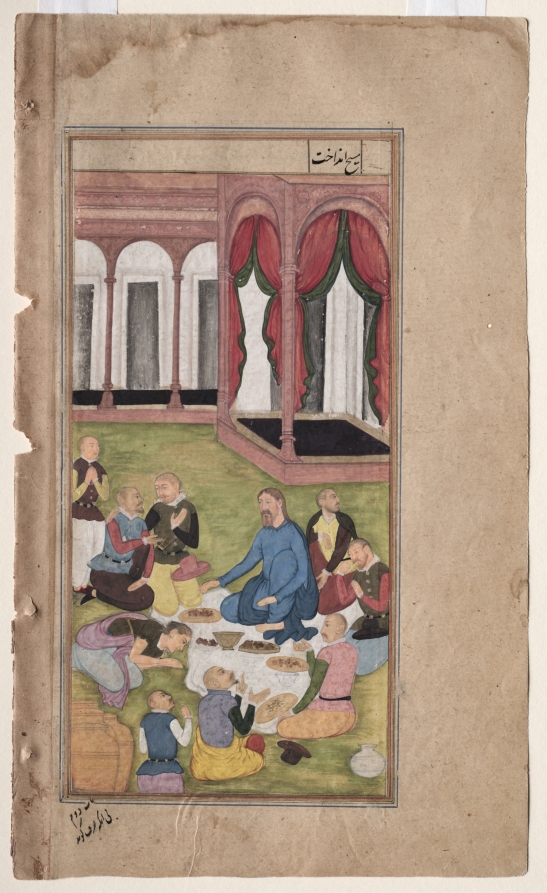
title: Mary Magdalene Presents Ointment to Jesus (folio 102 verso), from a Mirror of Holiness (Mir’at al-quds) of Father Jerome Xavier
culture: Mughal India, Allahabad, made for Prince Salim (1569–1627)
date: 1602–04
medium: Gum tempera, ink, color, and gold on paper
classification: Manuscript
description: While Jesus dined in the house of a Pharisee he was approached by Mary Magdalene, who threw herself to the ground and wept on Jesus’s feet with her tears. She then dried them with her hair and bathed them with expensive ointment. Her veil falls around her shoulders to reveal her hair’s disarray. Only Jesus appears to be calm as he extends his arms in a pacifying gesture; the other men point at their mouths and at each other, astonished at the dramatic behavior of this woman known to have been a prostitute. The plain black carpets and thin application of paint in some areas indicate that this painting was not finished.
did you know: Proportions of the portico and pavilion reveal some grasp of Renaissance ideals.